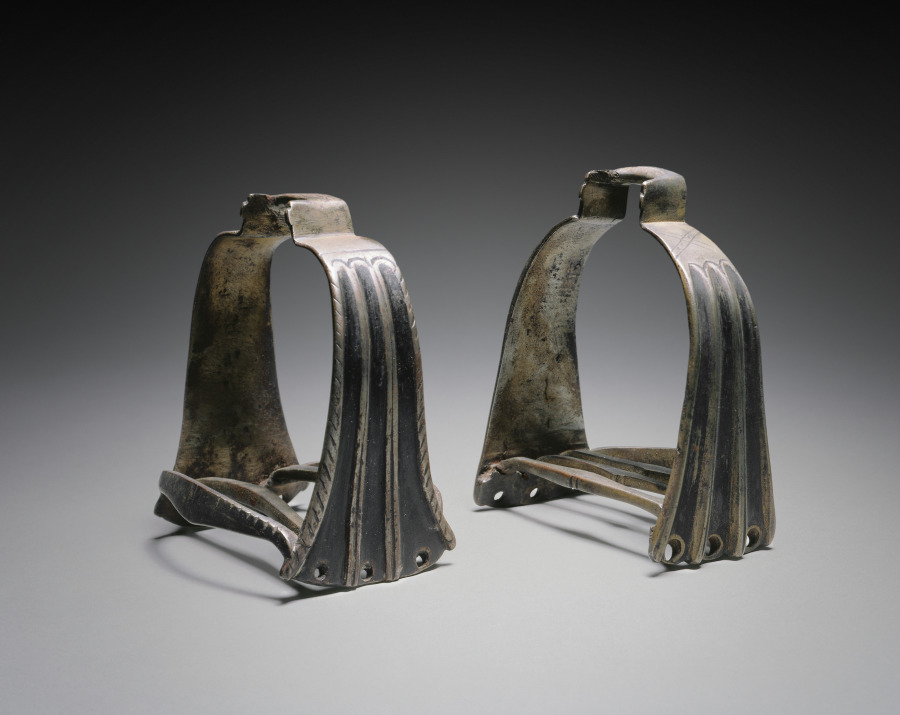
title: Stirrup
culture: Germany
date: c. 1525 – 1550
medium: steel with black paint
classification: Arms and Armor